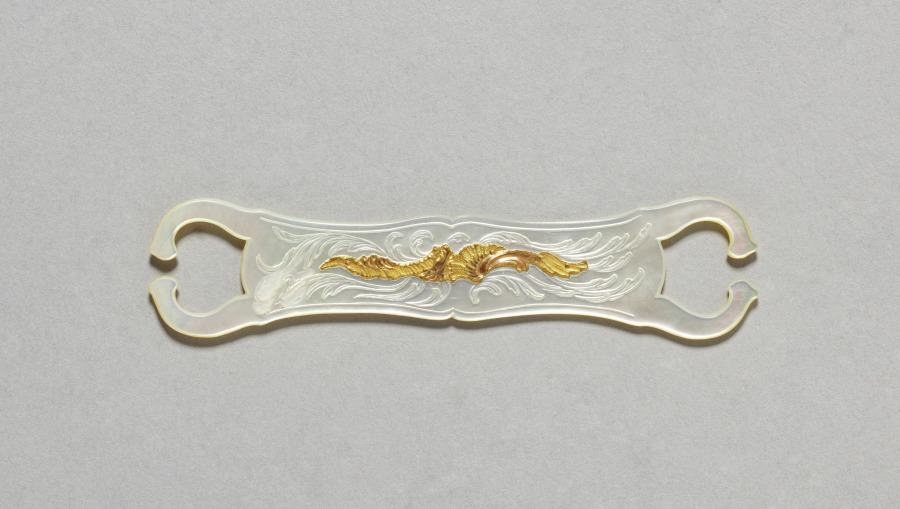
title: Bobbin from a Sewing Box (Nécessaire)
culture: Austria, possibly Vienna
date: c. 1765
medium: gold and mother-of-pearl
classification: Miscellaneous